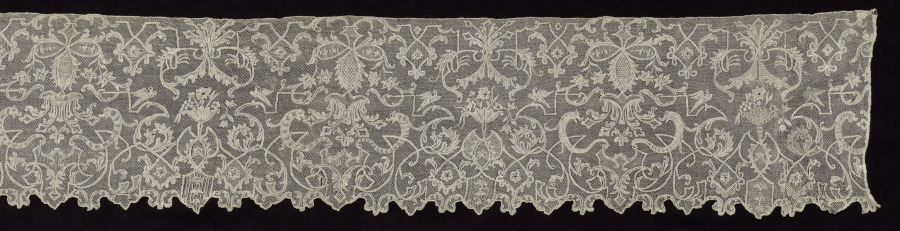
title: Lace Flounce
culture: England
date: 1680s–1790s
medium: Linen: needle lace (drawnwork) and embroidery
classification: Lace